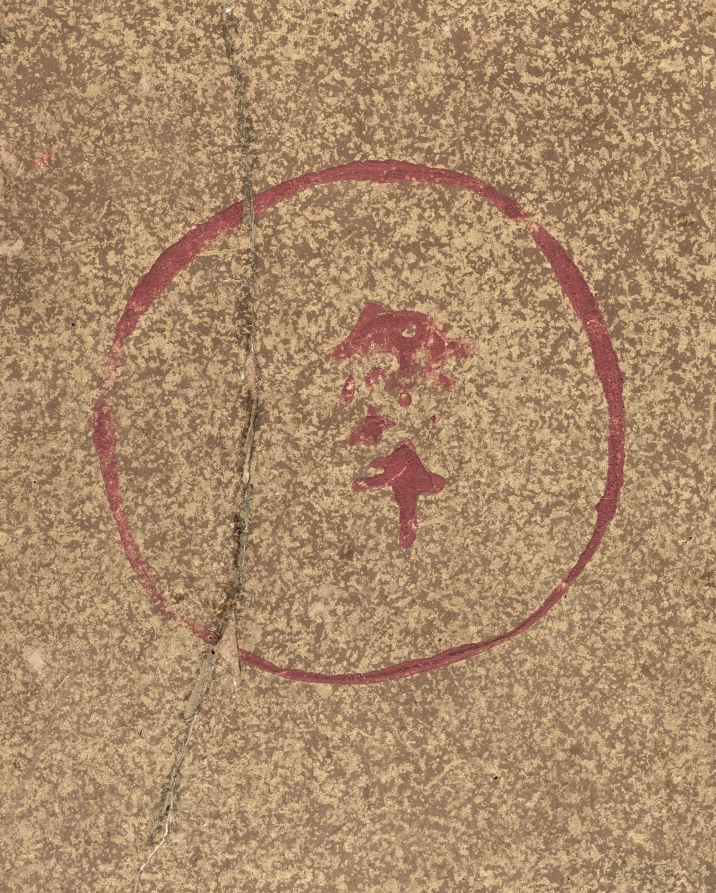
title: God of Thunder (Raijin)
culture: Japan, Edo period (1615–1868)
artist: studio of Tawaraya Sōtatsu (Japanese, c. 1570–c. 1640)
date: mid-1600s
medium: six-panel folding screen; ink, color, and gold on paper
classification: Painting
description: Such depictions of the God of Thunder originated in Buddhist art. Here, the image was painted on paper covered with gold dust, a technique often found in paintings by Tawaraya Sotatsu or of the Sotatsu school. This gold technique and the "Inen" seal here suggest that the anonymous painter of this screen was probably associated with the Sotatsu workshop. The artist used a prototype borrowed from earlier Japanese narrative painting—rather than mechanically reproducing Sotatsu’s image—and created a bold, innovative image that served the world of play and leisure in early Edo Japan. The theme of "God of Thunder" was often paired with "God of Wind" and has been frequently reinterpreted by generations of Rimpa artists. Unfortunately, the screen God of Wind which would have accompanied this God of Thunder cannot be located.